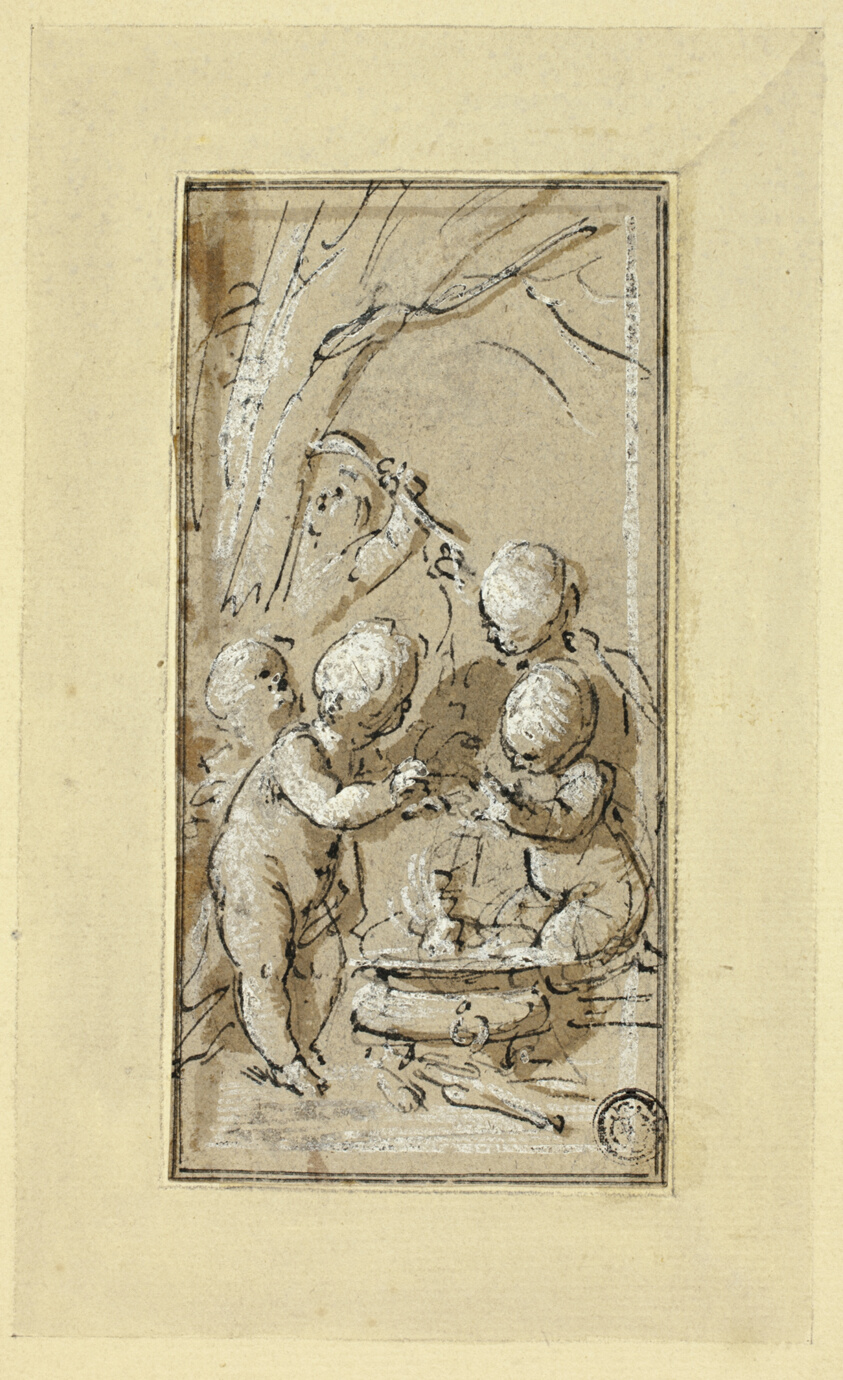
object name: Drawing and Watercolor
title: Allegory of Winter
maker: Jacob de Wit (Dutch, 1695-1754)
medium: Pen and brown ink with brush and brown wash, heightened with lead white (partly discolored), on buff wove paper, laid down on card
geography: Holland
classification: pen and ink drawings; drawings (visual works); prints and drawing